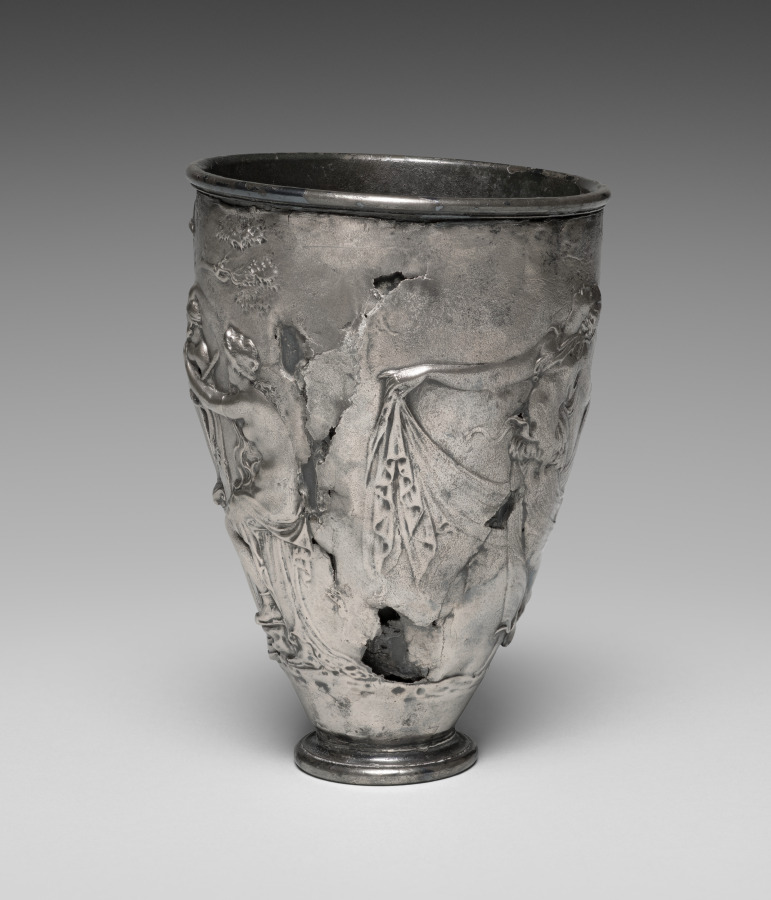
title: The Vicarello Goblet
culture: Italy, Vicarello (ancient Aquae Apollinares), Roman, Augustan period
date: 25 BCE–25 CE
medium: silver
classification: Metalwork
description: This masterpiece of the Roman silversmith’s art is exquisitely worked in relief. The multifigure scene centers on a rustic shrine of the ithyphallic fertility god Priapus, son of Dionysos. He takes the form of a stylized boundary marker atop a column, where a woman seems to have brought him to life by touching him. To the left sits a table with votive offerings to the god. Flanking the shrine are a satyr and maenad, dancing ecstatically.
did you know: This silver cup was found north of Rome at Vicarello (ancient Aquae Apollinares), probably in 1862.